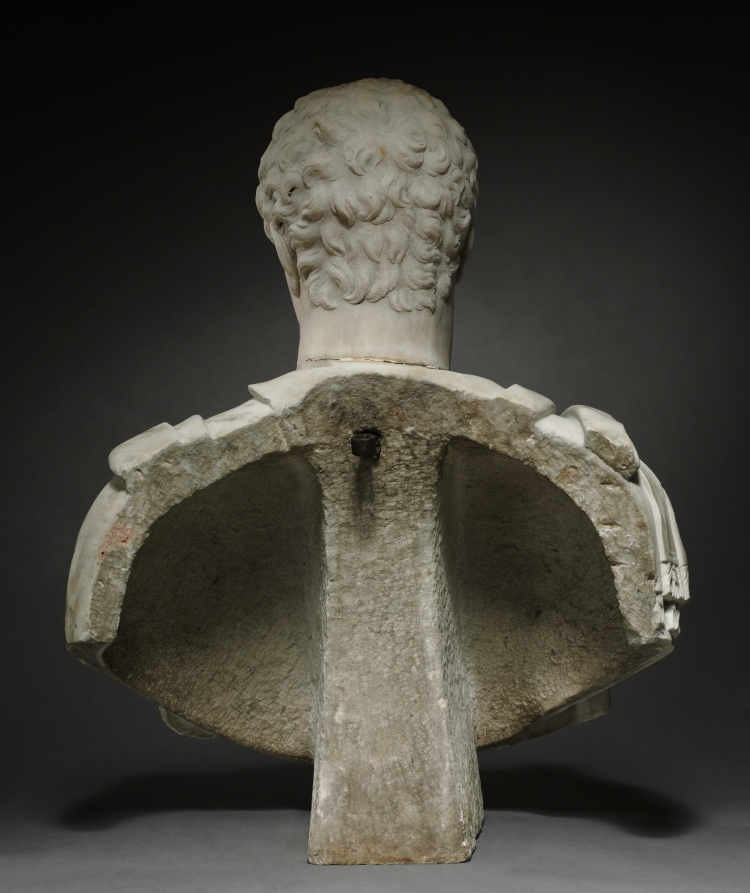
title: Bust of a Roman General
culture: Italy, 16th century or later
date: 1500s or later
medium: marble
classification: Sculpture